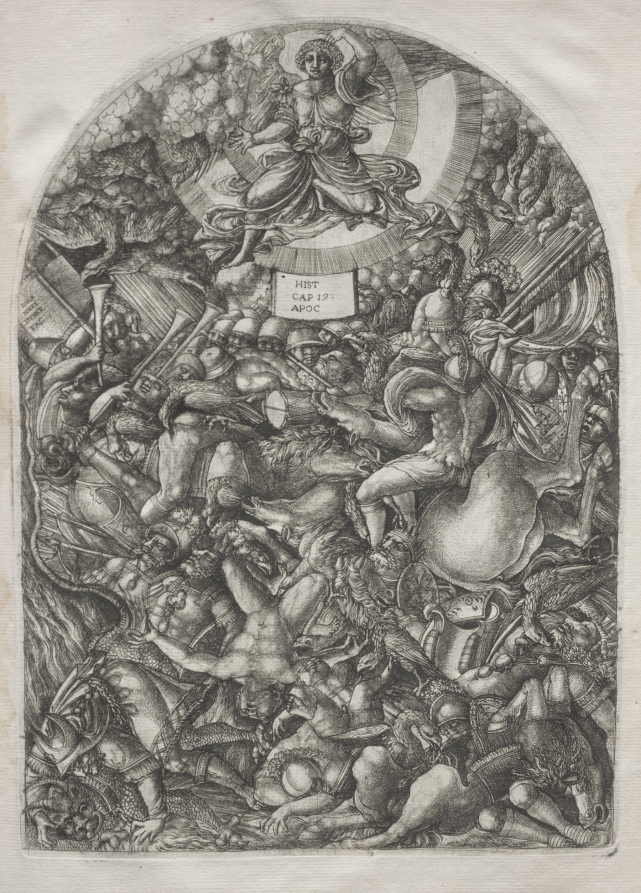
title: The Apocalypse: The Angel in the Sun Calling the Birds of Prey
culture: France, 16th century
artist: Jean Duvet (French, 1485–1561)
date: 1546–1556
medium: engraving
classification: Print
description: This print is part of a bound volume of works illustrating the a narrative of the Apocalypse, taken from the Revelation of Saint John in the Bible. The 23 engravings in the series occupied the artist for a number of years and represent his greatest artistic achievement. The museum's volume is one of only seven known complete sets. Jean Duvet was one of the first major printmakers in France and one of the most original artists of the 1500s. Although he worked mostly in the provincial city of Langres, he became aware of Italian art through the circulation of prints—notably those of Marcantonio Raimondi. His solidly modeled human figures reflect the influence of the Italian High Renaissance. Duvet, however, developed an idiosyncratic, highly artificial style with crowded compositions that ignore rational space in favor of ornamental surface patterns.